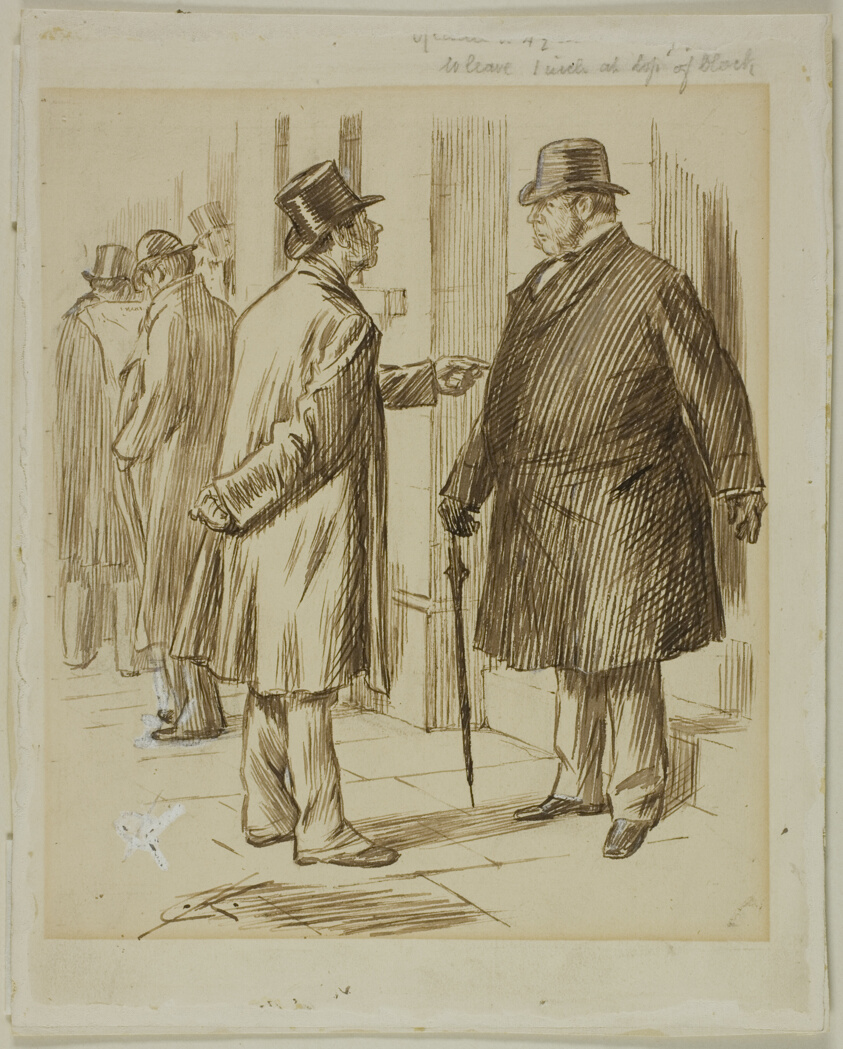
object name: Drawing and Watercolor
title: Accommodation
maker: Charles Samuel Keene (British, 1823-1891)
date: 1870/91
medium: Pen and brown ink, with brush and brown wash and touches of white gouache, over traces of graphite, on tan wove paper, laid down on card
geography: England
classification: pen and ink drawings; drawings (visual works); prints and drawing